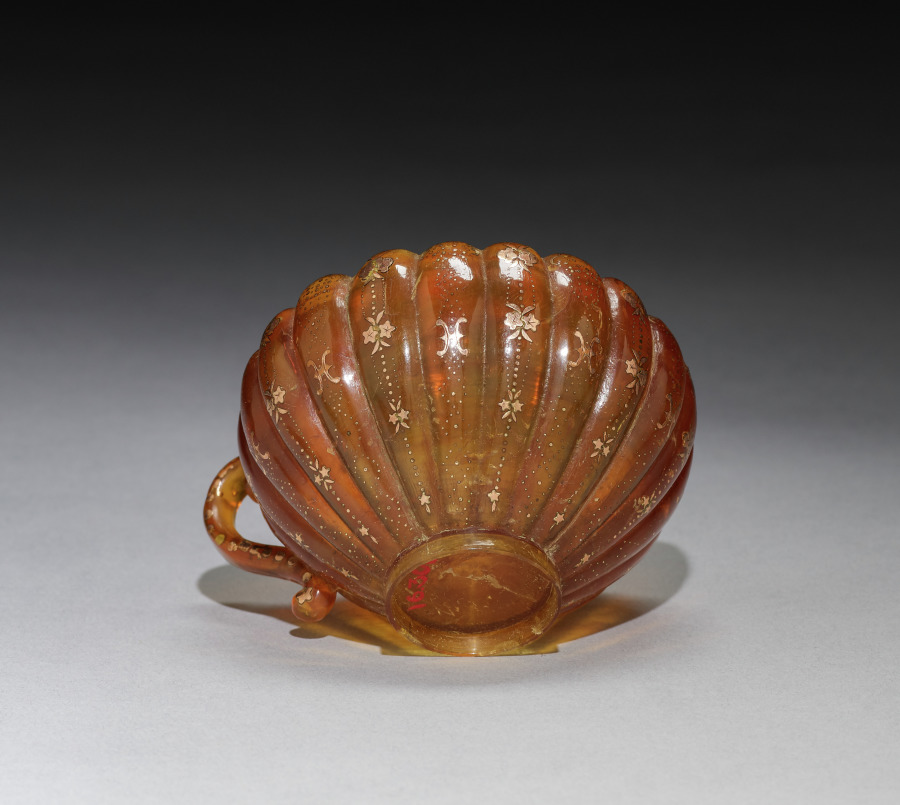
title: Cup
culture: France, 18th century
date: c. 1730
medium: amber decorated with inlaid gold and mother-of-pearl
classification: Miscellaneous